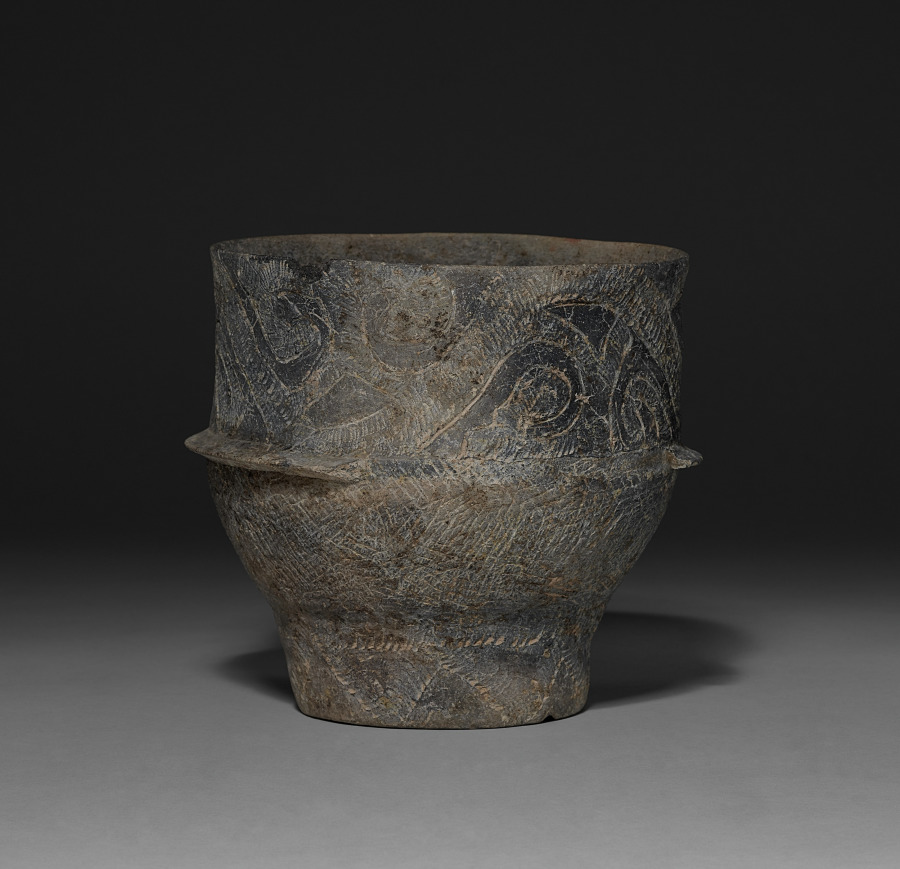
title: Jar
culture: Thailand, Ban Chiang, Neolithic Period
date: early 3000s BCE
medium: gray earthenware with incised decoration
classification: Ceramic